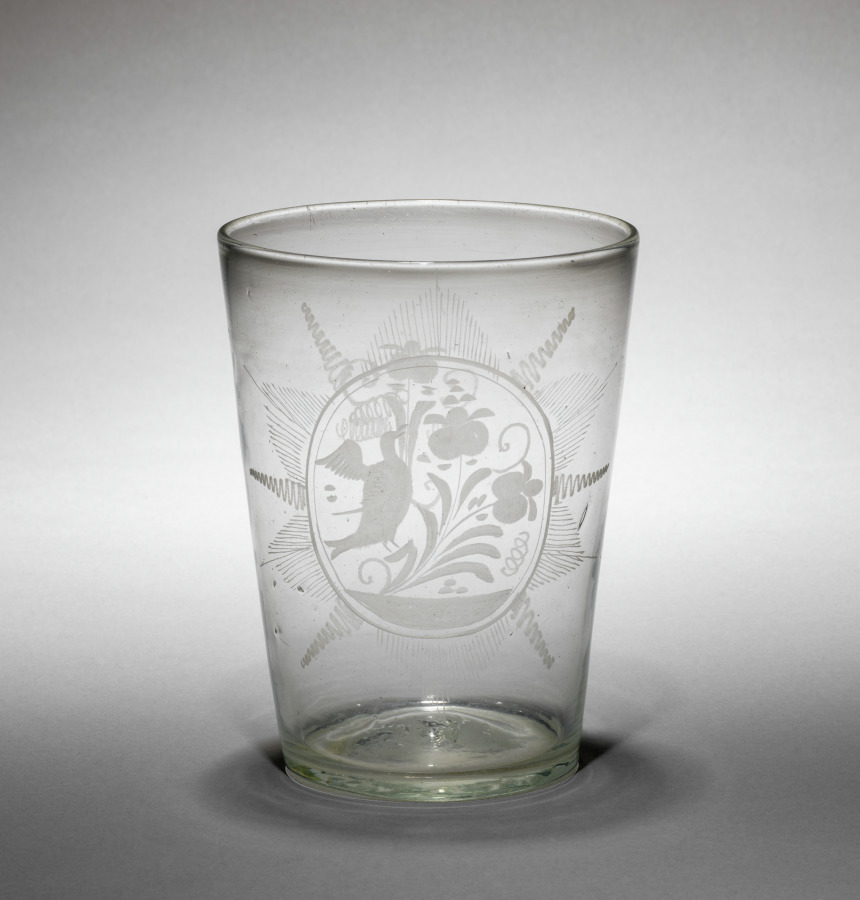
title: Flip Glass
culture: America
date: late 1700s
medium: glass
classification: Glass